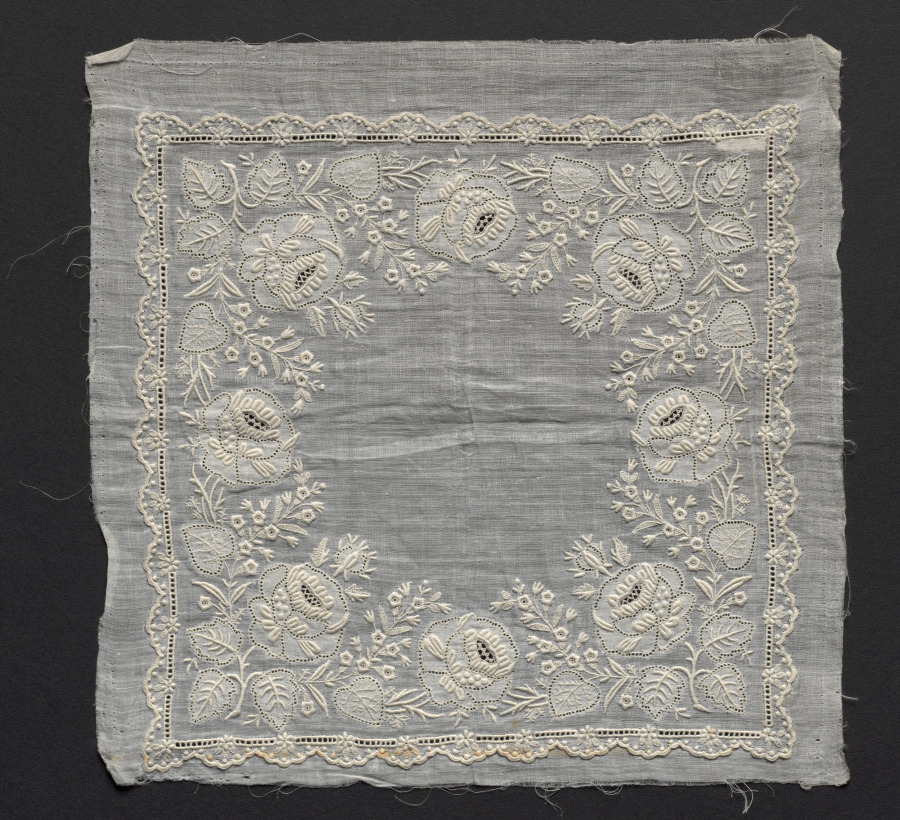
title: Handkerchief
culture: England(?)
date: 1800s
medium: Plain weave linen, embroidered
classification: Embroidery